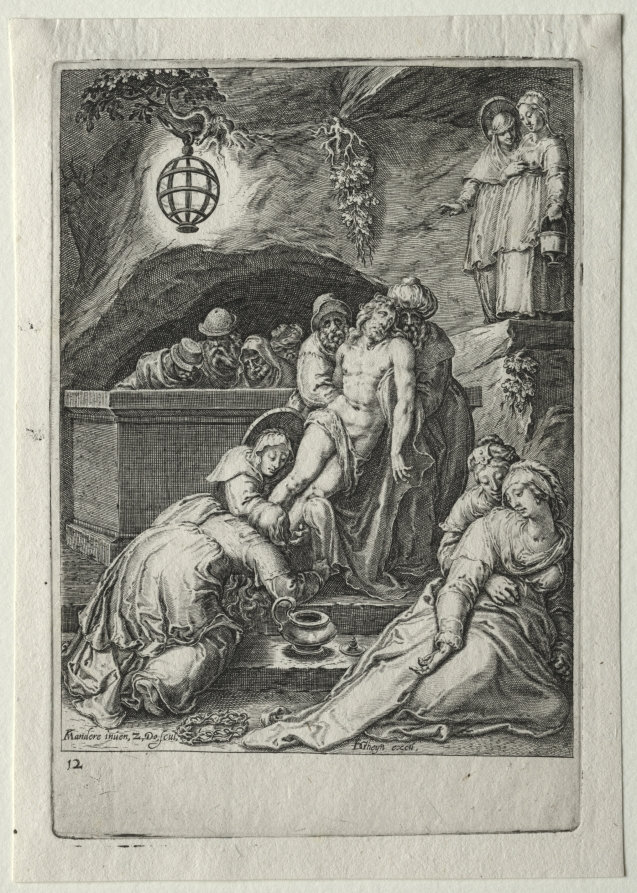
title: Passion Set: Burial of Christ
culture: Netherlands, 16th century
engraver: Zacharias Dolendo (Dutch, 1561–1604)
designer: after Karel van Mander I (Dutch, 1548-1606)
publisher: Jacob de Gheyn II (Netherlandish, 1565–1629)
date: 1596–98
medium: engraving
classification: Print